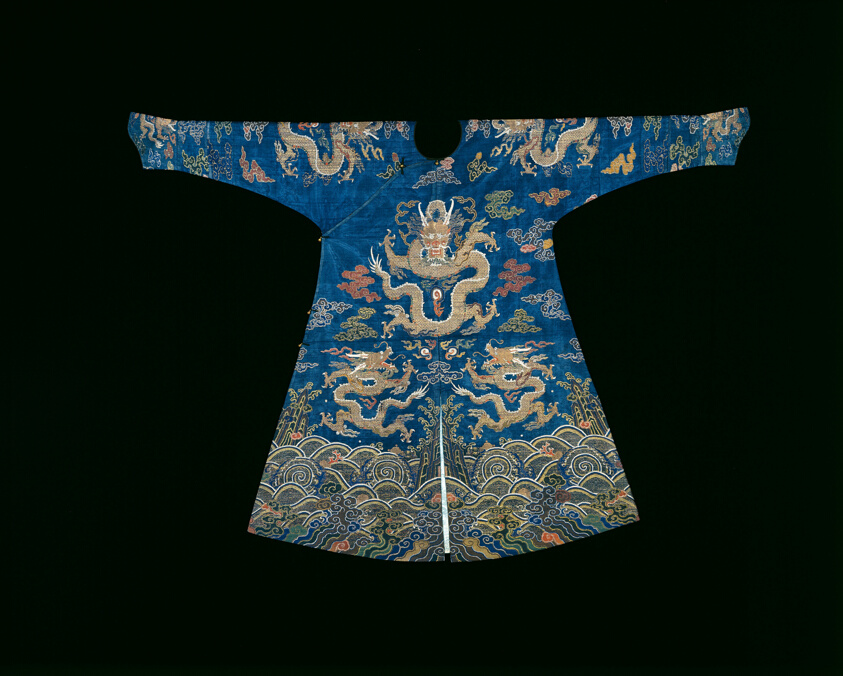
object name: Costume and Accessories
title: Man's Jifu (Semiformal Court Robe)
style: manchu-style, qing, Chinese (culture or style), East Asian, asian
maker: Manchu (China)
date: Qing dynasty (1644–1911), 1720/40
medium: Silk and gold-leaf-over-lacquered-paper strips, 1:1 plain gauze weave with supplementary brocading wefts; cuff trim: silk, plain weave; neck trim and closures: silk, warp-float faced 7:1 satin weave; lined with silk, plain weave self-patterned by areas of 1:1 plain gauze crossings; cuffs lined with silk, plain weave; metal buttons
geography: China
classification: textile; costume; weaving